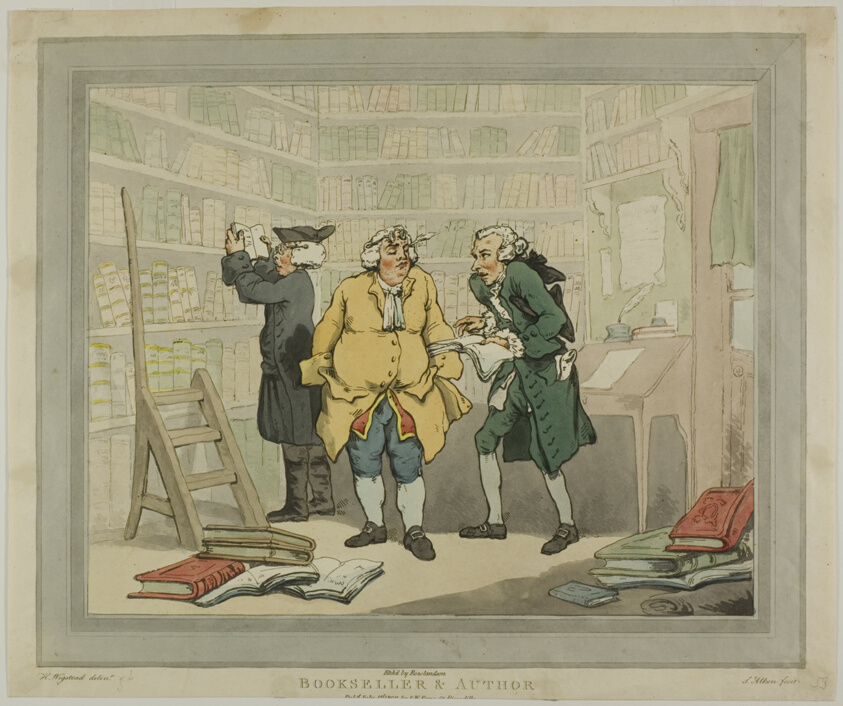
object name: Print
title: Bookseller and Author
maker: Thomas Rowlandson (English, 1756-1827); after Henry Wigstead (English, c. 1745-1800); published by S.W. Fores (English, 1761-1838)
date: published September 25, 1784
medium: Hand-colored etching and acquaint on ivory wove paper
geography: England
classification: etching; print; prints and drawing